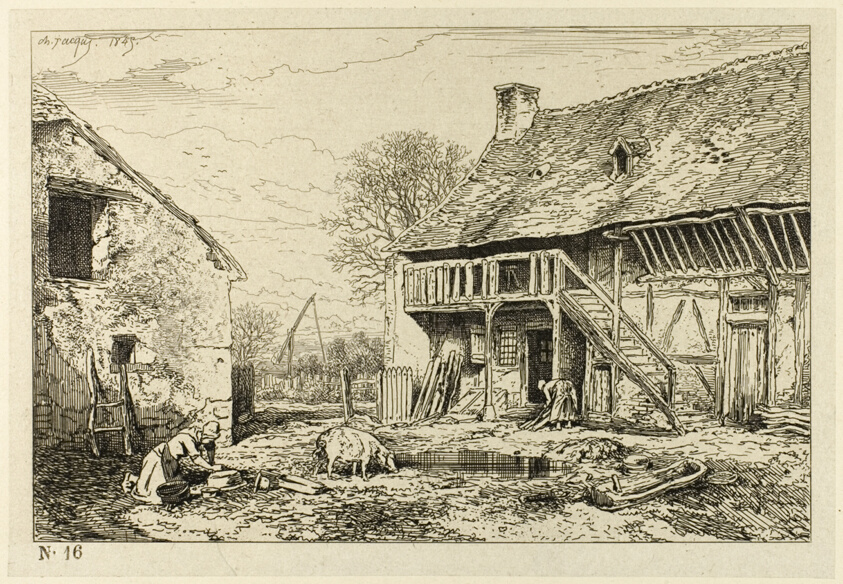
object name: Print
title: Courtyard of a Peasant Dwelling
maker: Charles Émile Jacque (French, 1813-1894)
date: 1846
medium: Etching on light gray China paper laid down on ivory wove paper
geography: France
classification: etching; print; prints and drawing